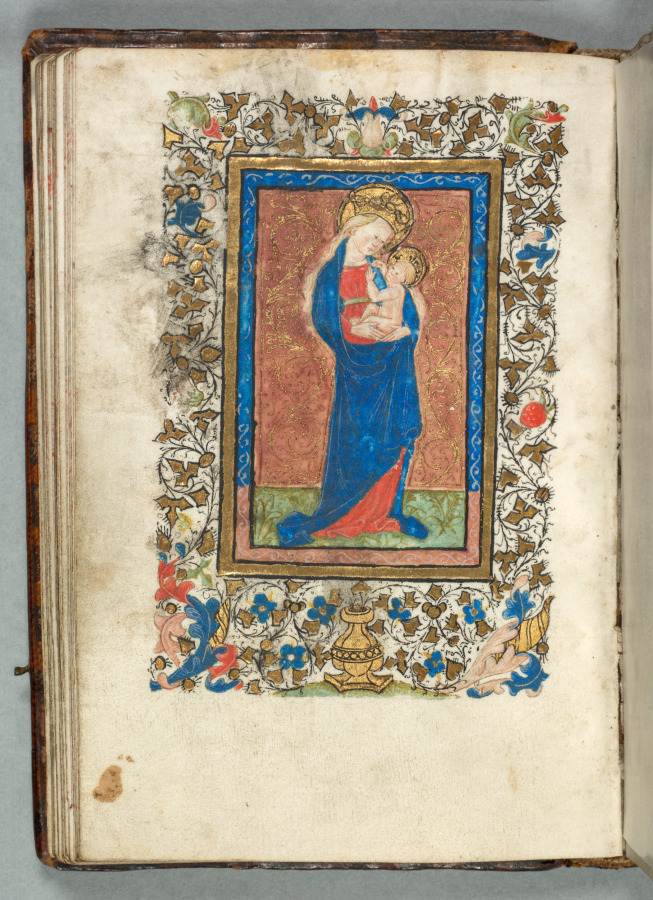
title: Book of Hours (Use of Metz): Fol. 26v, Virgin and Child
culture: France, Metz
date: c. 1440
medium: ink, tempera, and gold on vellum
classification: Bound Volume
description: This volume contains only one full-page miniature (opened here) of the Standing Virgin with Child. It introduces the prayer: "Holy Mary, faultless Lady, intercede for us..." The first seven folios of the book list dedications of Metz churches and indulgences which are unique to that diocese. The city of Metz, situated on the Moselle River, was the cultural and commercial capital of Lorraine during the 1400s. It was also the location of an important bishopric (diocese of a bishop) and, therefore, the center of a growing book trade.